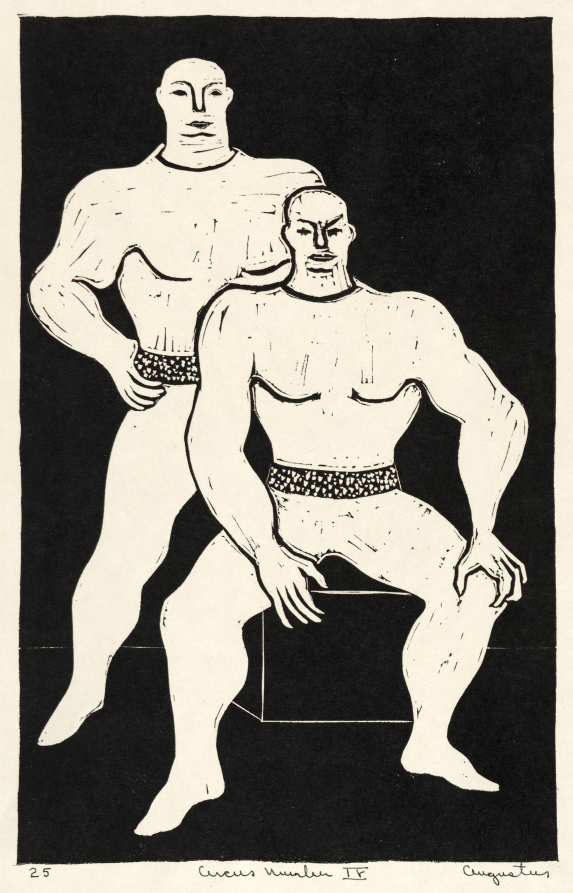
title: Circus, No. 4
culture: America, Ohio, Cleveland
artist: Augustus Peck (American, 1906–1975)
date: 1920–30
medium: linoleum cut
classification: Print